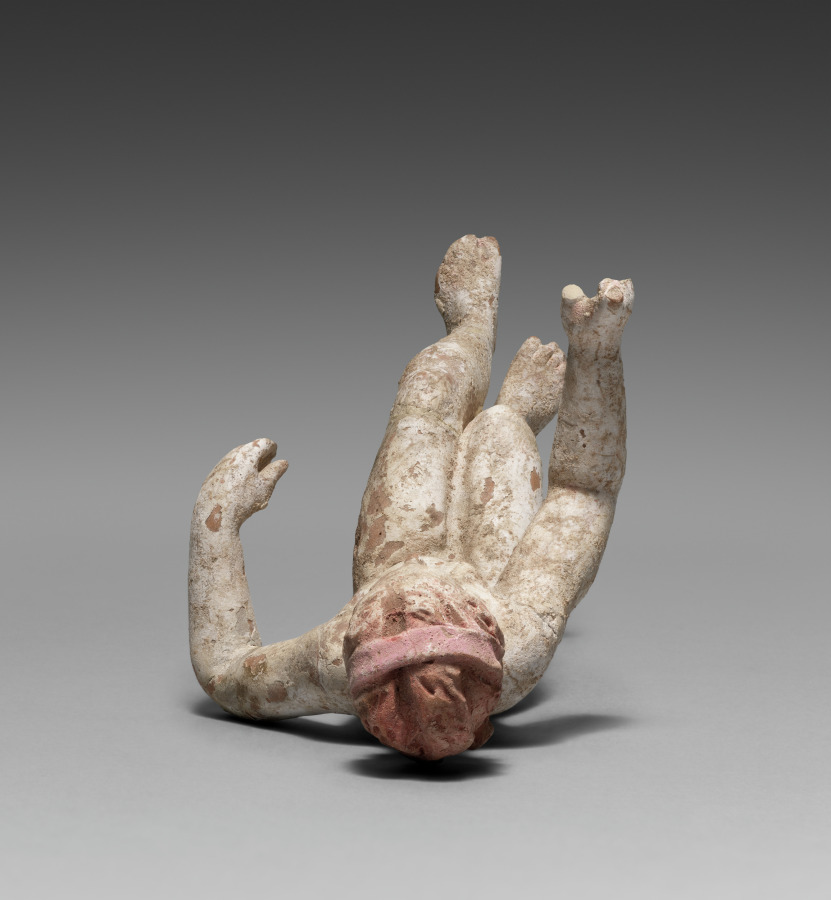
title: Figurine of a Nude Woman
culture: Greece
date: 400–200 BCE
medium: terracotta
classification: Sculpture